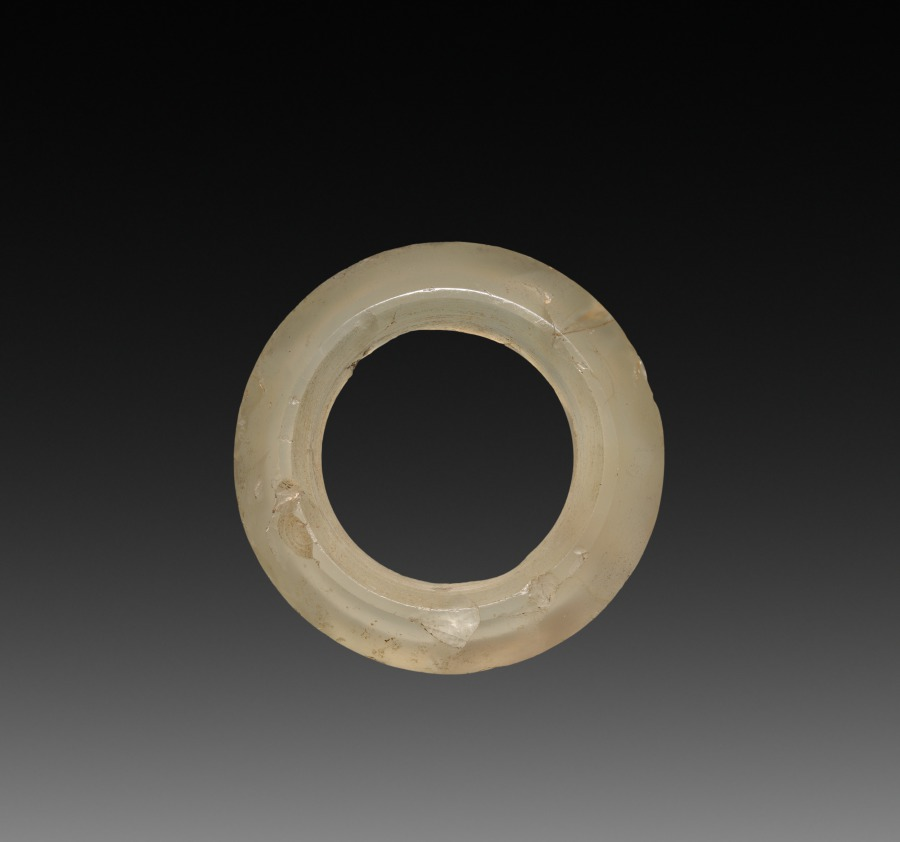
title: Ring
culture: China, Han dynasty (202 BCE–220 CE) or later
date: 200 CE or later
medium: agate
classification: Jewelry